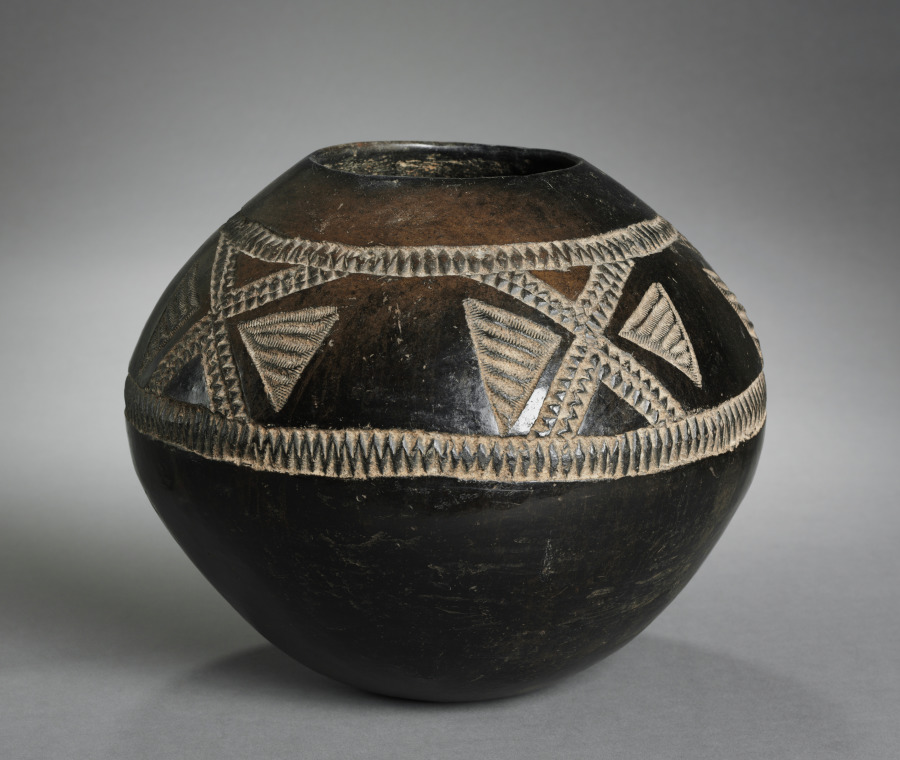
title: Pot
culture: Southern Africa, South Africa, Zulu-style potter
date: 1900s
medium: Terracotta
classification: Vessels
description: Within the Zulu culture (the Northern Nguni tribe), the making of beer pots is the traditional function of women. A potter will travel far searching in riverbeds or for anthills that can supply the correct clay for the vessels. Formed using the coil technique and smoothed using flattened stones, the pots are fired in a dug-out earthen "kiln," and covered with palm leaves, whose oil results in the blackened, shiny texture of the vessels. Years of use deepen this texture to a rich woody patina.